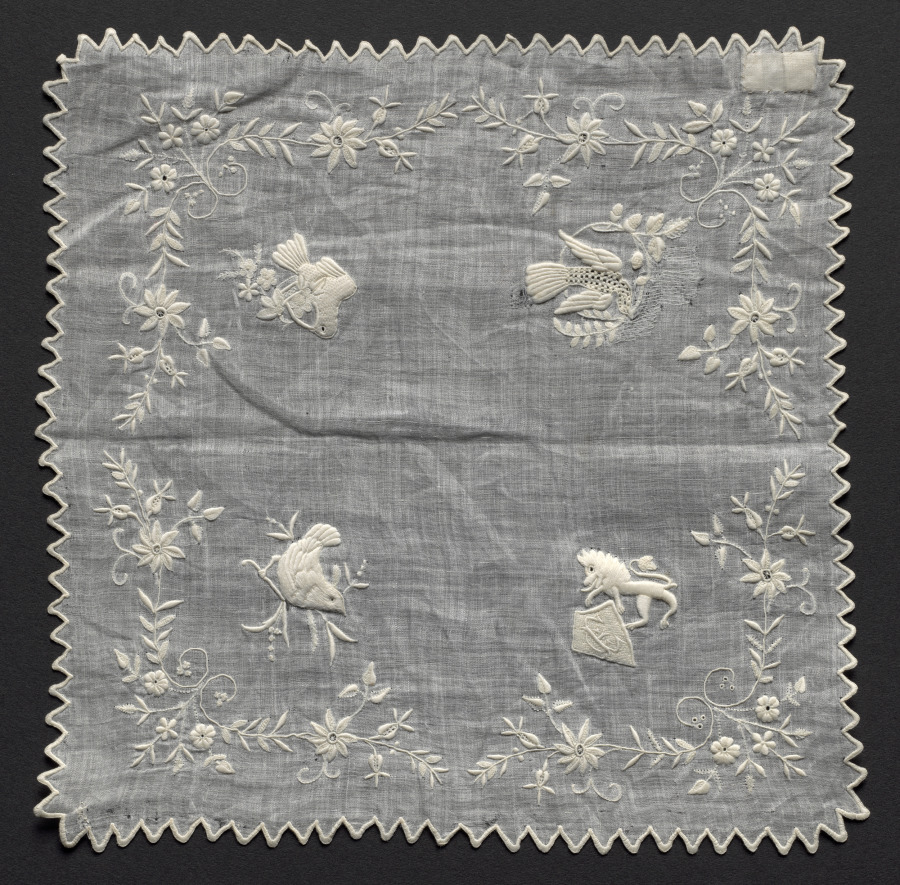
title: Handkerchief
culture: France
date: 1800s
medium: Plain weave linen, embroidered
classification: Embroidery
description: The embroidery in three of four corners of this handkerchief consists of birds. In the fourth corner are a spray of flowers and a lion with a shield on which is monogramed the initials G E.